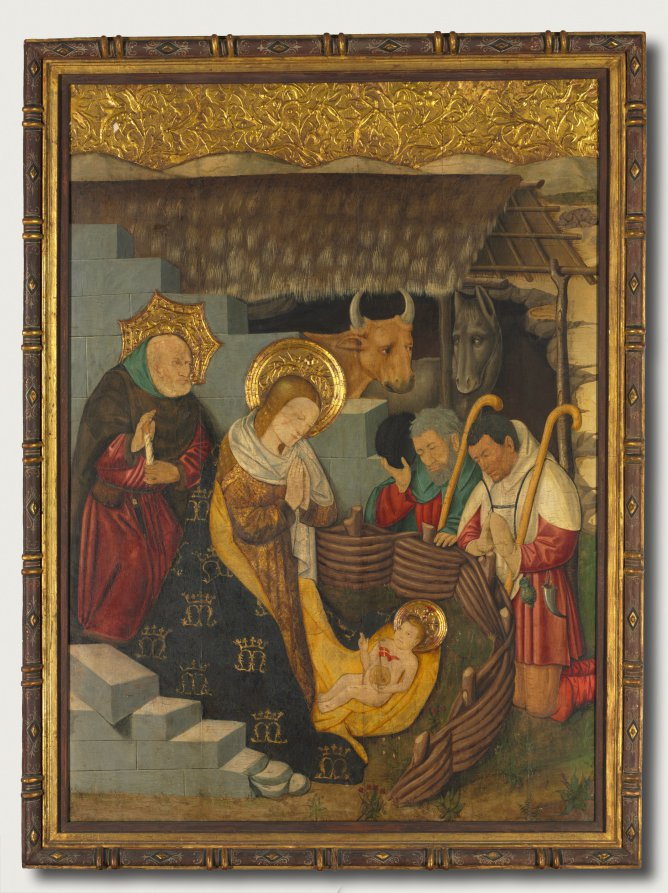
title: The Nativity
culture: Spain, Catalonia, 15th century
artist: Jaume Ferrer the Younger (Spanish, Catalonia died c. 1460/70)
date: c. 1457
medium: oil, tempera, and gold on wood panel (fir)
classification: Painting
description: This painting is believed to be a remaining component of a six-panel altarpiece. The large central panel is now preserved in the Museu National d’Art de Catalunya in Barcelona. Ferrer collaborated with the painter Pere Garcia de Benavarri on this commission. Spanish works like these often feature elaborate treatment of the gold background, evident here in the exuberant raised decoration (called pastiglia) in the haloes. As a symbol of his dominion over the world, Christ holds an orb in his left hand; he bestows a blessing with his right hand. The Virgin kneels above him in rapt adoration. Using the wattle fence almost as a church pew, two shepherds express humble piety; one removes his hat and the other clasps his hands in prayer.